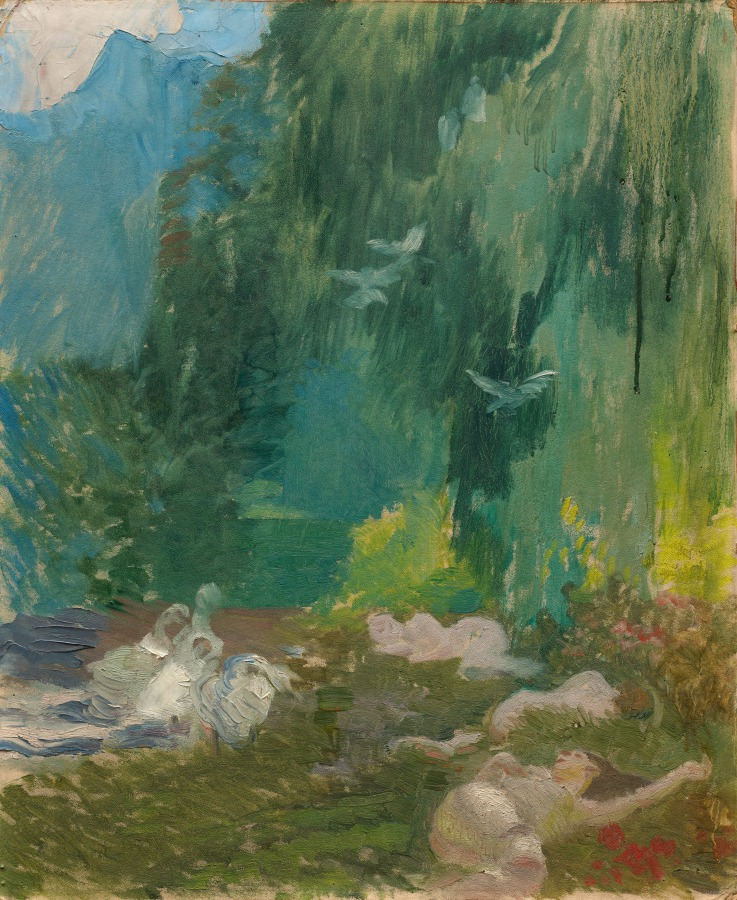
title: The Siesta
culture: France, 19th century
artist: Albert Besnard (French, 1849–1934)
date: c. 1890 – 1920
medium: oil on board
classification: Painting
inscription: Signed lower left: ABesnard [AB in monogram]